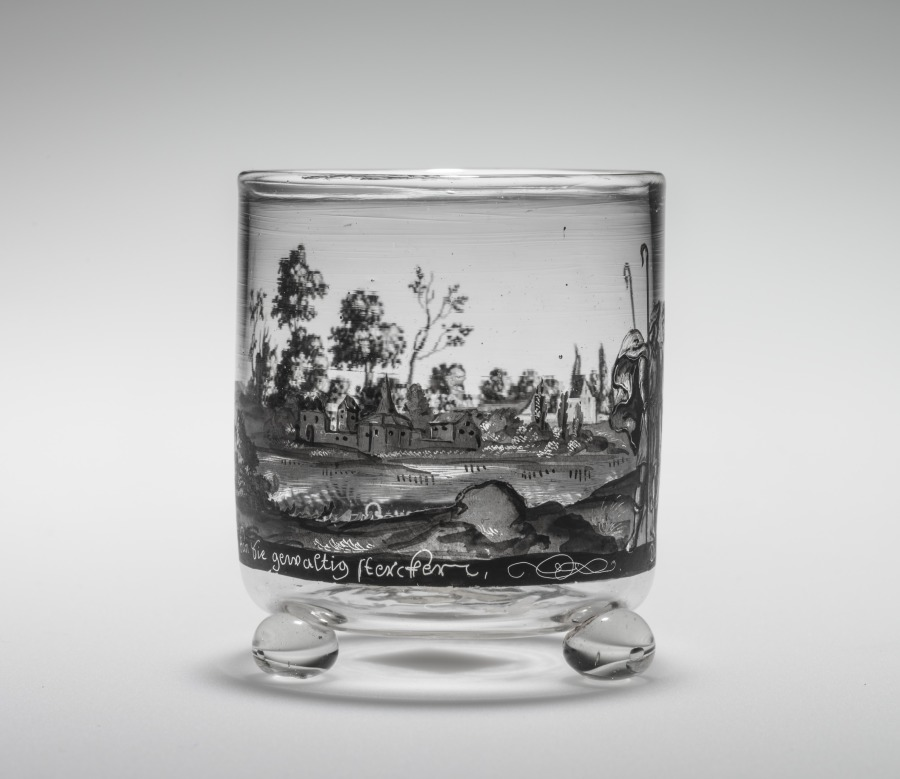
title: Tumbler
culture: Germany, Nuremberg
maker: attributed to Johann Schaper (German, 1635–1670)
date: 1670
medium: glass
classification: Glass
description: Johann Schaper (1621-1670) was a German painter of stained glass, mainly working in Nuremberg and Regensberg, who later turned to decorating glass and ceramics from his home, typical of artisans in the 17th century (hausmaler). His style was mainly a linear one in the manner of engravings, and often he worked in black (schwarzlot) or dark colors. Schaper was so influential that other artisans tried to copy his technique, in which he scratched out details with a needle, with varying degrees of success.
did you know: The fine details of the decoration on this tumbler were achieved by scratching away the enamel with a needle.